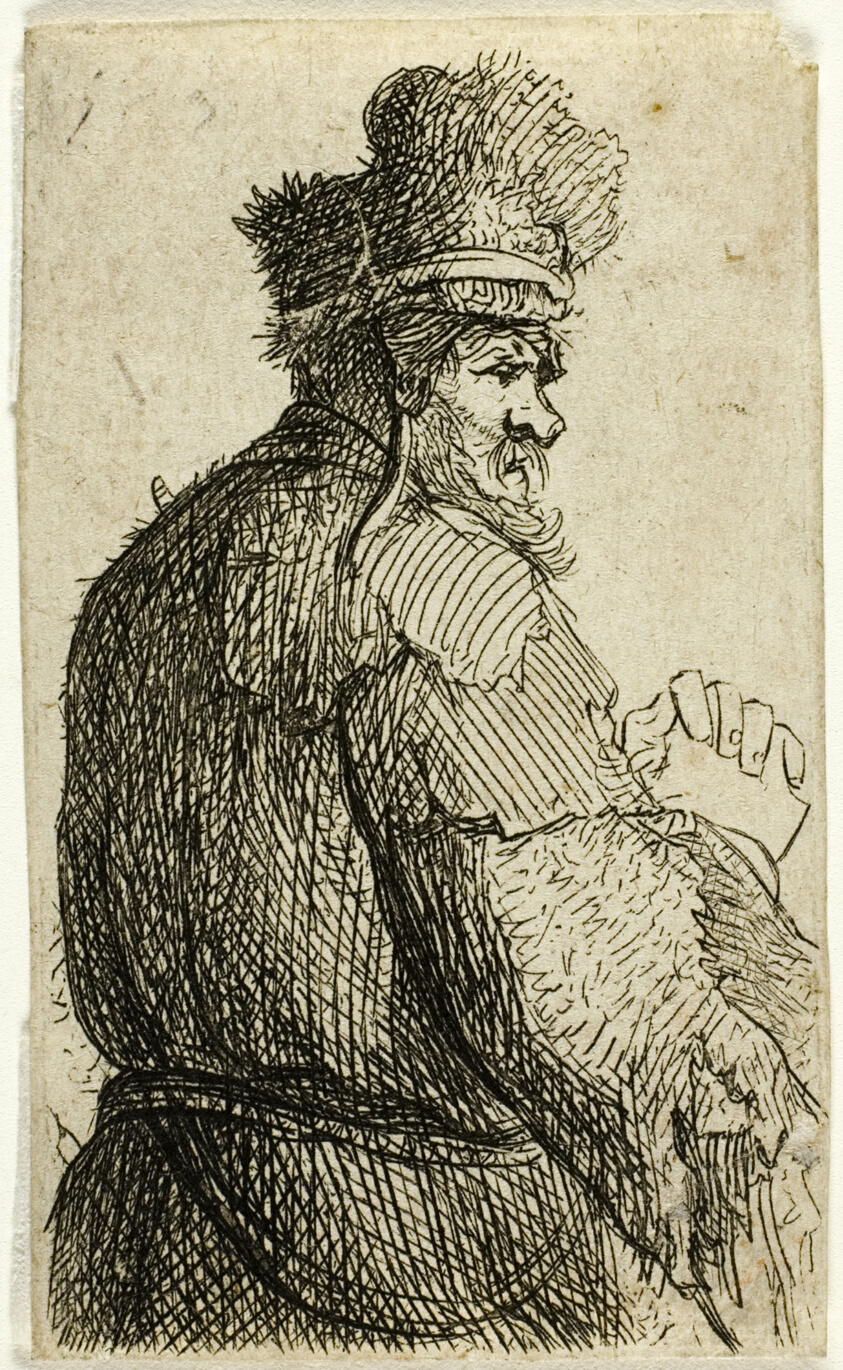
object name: Print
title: Old Man Seen from Behind, Profile Right: Half-Figure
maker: Rembrandt van Rijn (Dutch, 1606-1669)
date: c. 1629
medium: Etching on paper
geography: Holland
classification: etching; print; prints and drawing; paper